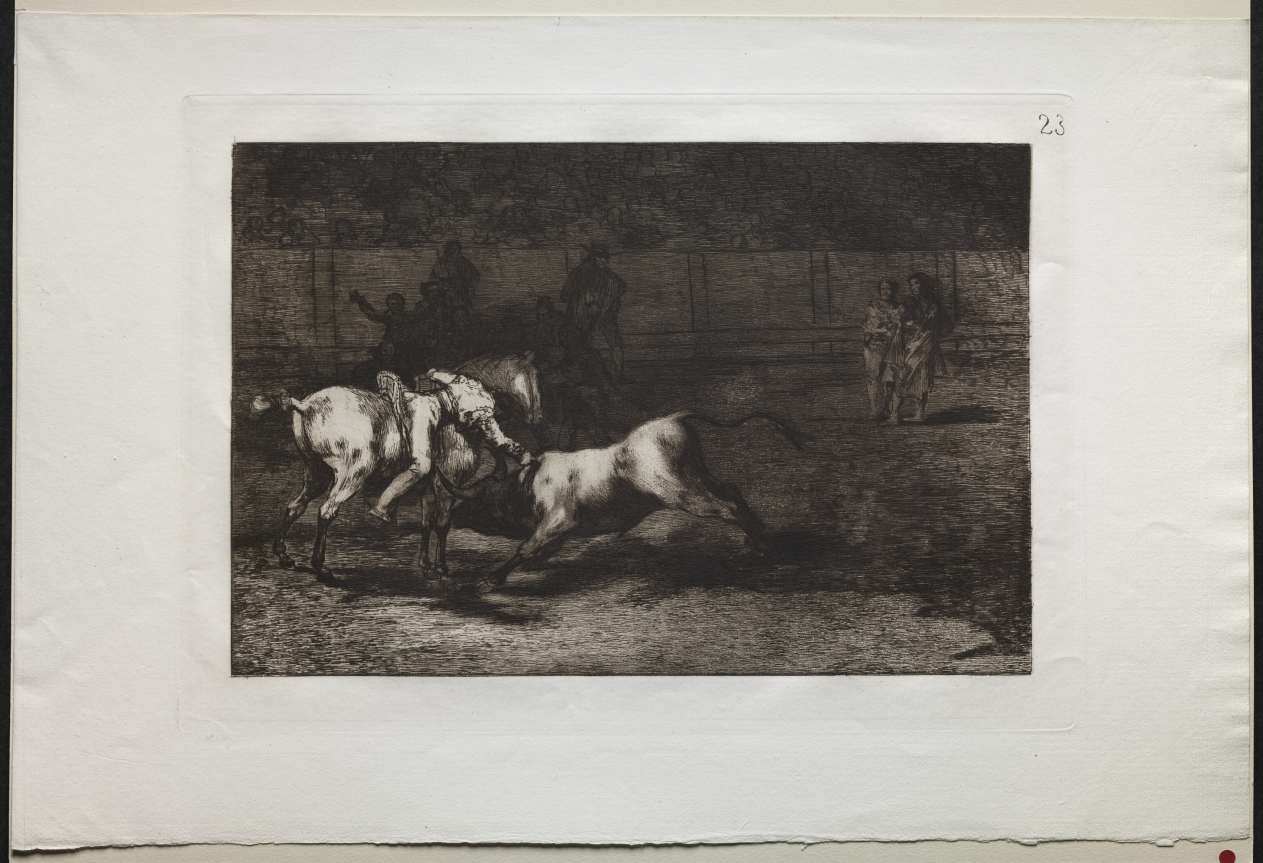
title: Bullfights: Mariano Ceballos, Alias the Indian, Kills the Bull From his Horse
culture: Spain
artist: Francisco de Goya (Spanish, 1746–1828)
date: 1816, printed 1876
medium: engraving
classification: Print